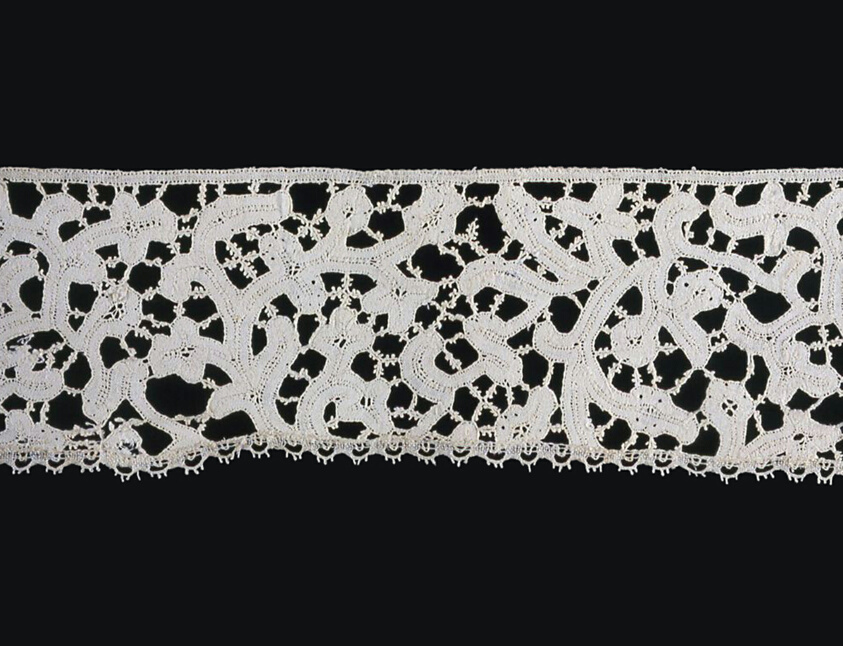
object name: Textile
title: Fragment (Border)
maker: Northern Italy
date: 1701/25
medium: Linen, bobbin straight lace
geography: Italy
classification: textile; lace - bobbin